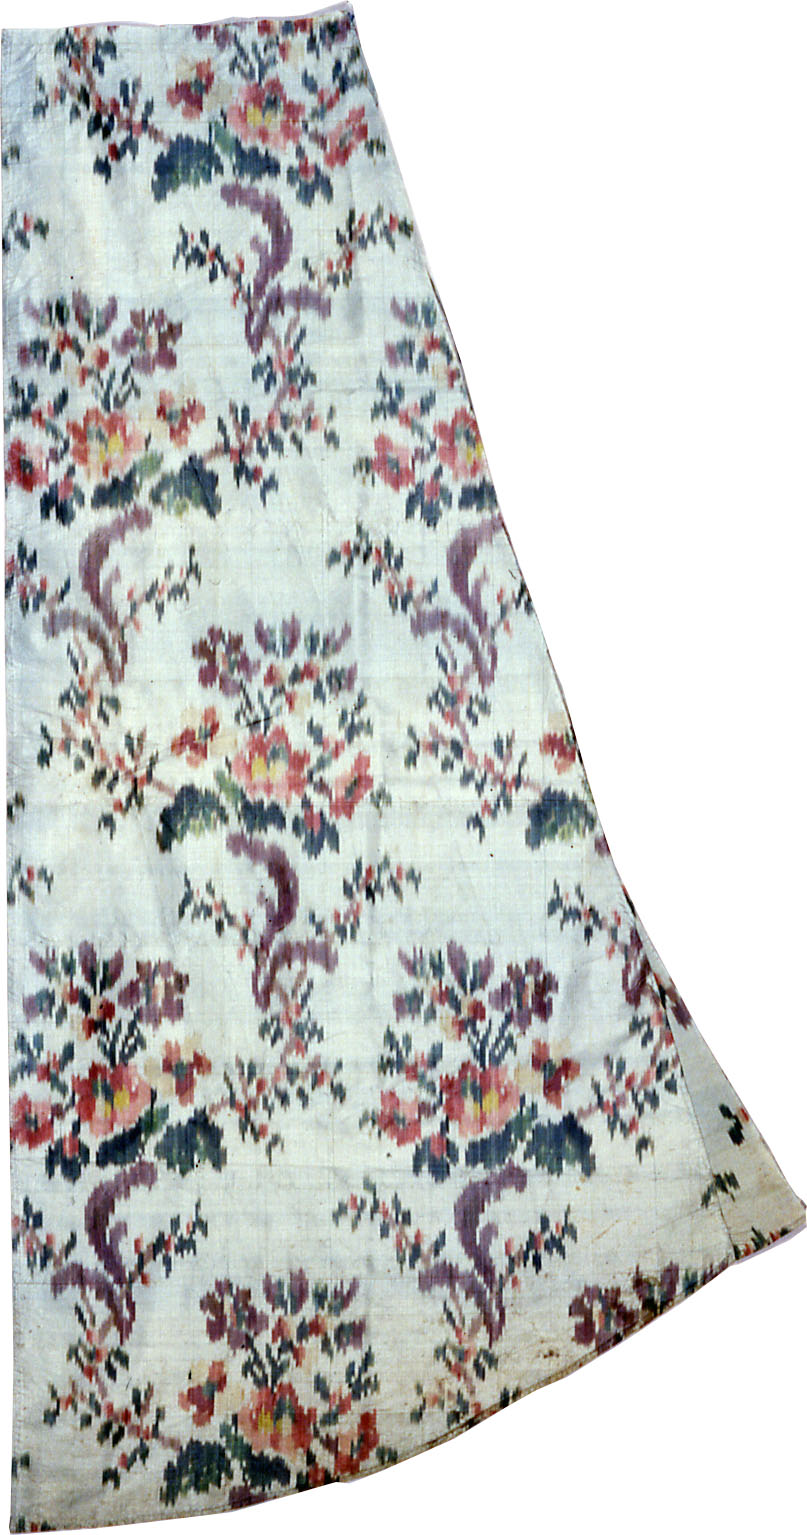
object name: Textile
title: Panel from a Skirt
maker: England or France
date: 18th century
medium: Silk, plain weave; warp-painted (chiné)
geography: England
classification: textile; weaving - printed; costume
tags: flowers, foliage